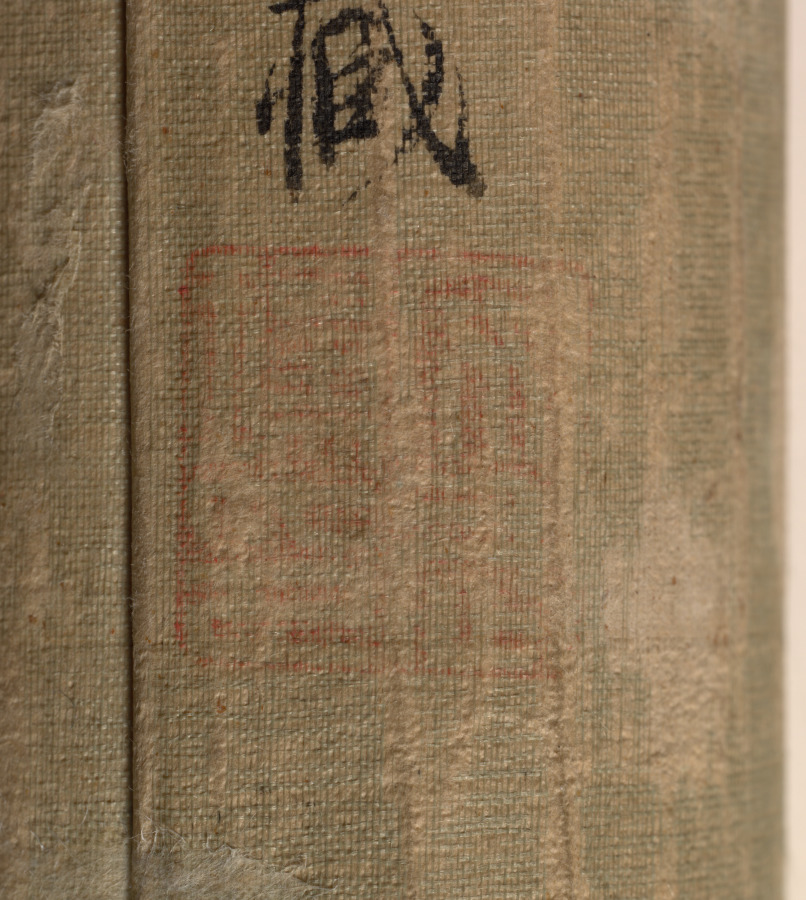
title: Landscape with Fishermen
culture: Korea, Joseon dynasty (1392–1910)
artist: attributed to Yi Bul-hae (Korean, active 1500s)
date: 1600s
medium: hanging scroll; ink and slight color on silk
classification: Painting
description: Clad in a straw rain poncho and wide-brimmed hat, a fisherman is seated in a small boat. Reeds sparkle on the far shoreline among dark, black rock forms that appear to float above the water. On the near shoreline are a pair of pines, a grove of bamboo or water reeds, and two withered deciduous trees from which moss hangs. This landscape painting, which emphasizes an intimate solitary moment through evoking various atmospheric elements—rain, evening light, and frosty air—was one of the main subjects of mid- and late 16th-century landscape paintings.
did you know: This landscape painting emphasizes an intimate solitary moment by evoking various atmospheric elements: rain, evening light, and frosty air.